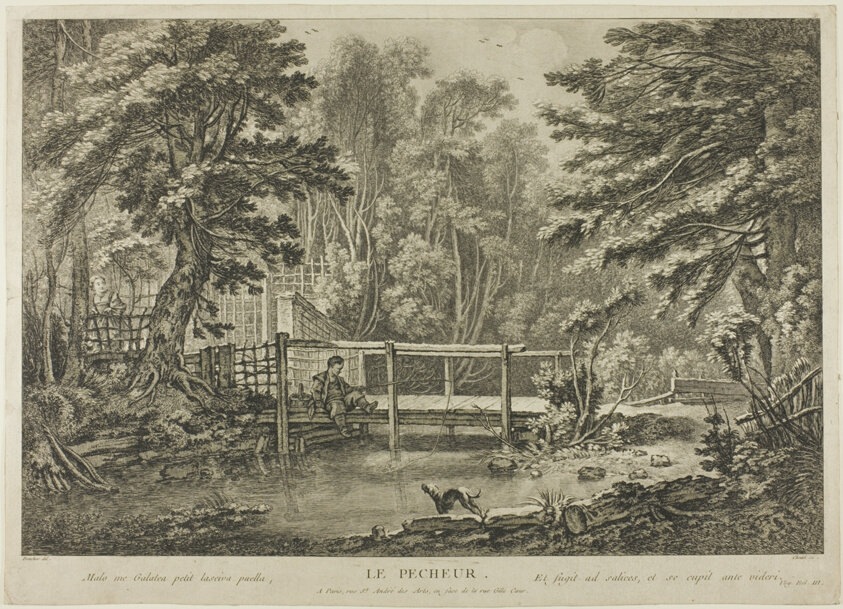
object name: Print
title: The Fisherman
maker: Pierre Quentin Chedel (French, 1705-1762); after François Boucher (French, 1703-1770)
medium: Engraving on paper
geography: France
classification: etching; print; prints and drawing